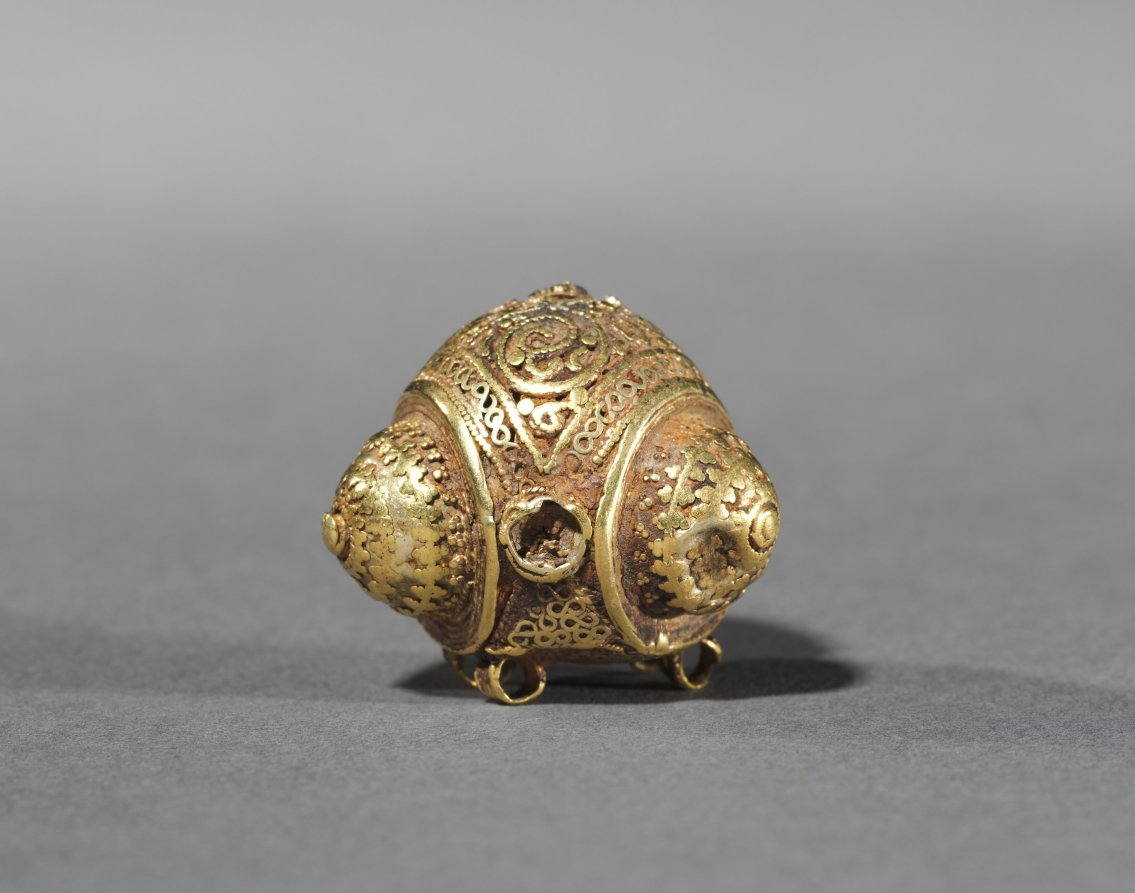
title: Button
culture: Iran, 10th-11th century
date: 900s–1000s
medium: gold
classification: Jewelry